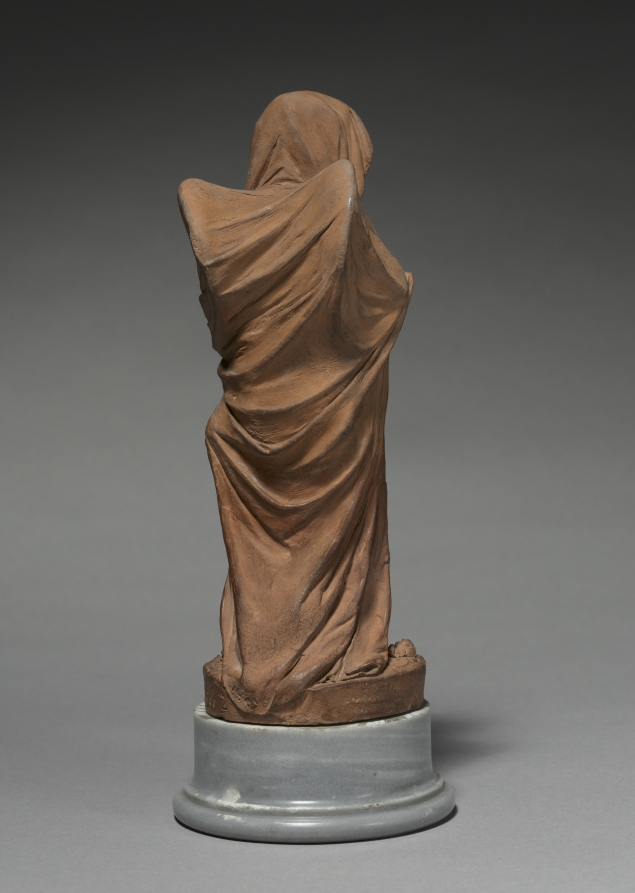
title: Cupid Secretly Drawing an Arrow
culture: Belgium, Brussels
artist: Gilles-Lambert Godecharle (Belgian, 1750–1835)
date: 1807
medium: terracotta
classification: Sculpture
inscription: inscribed on the edge of the base at right: "Godecharle" and "1807."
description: This clay model is a maquette for a sculpture in limestone more than three feet tall, entitled Cupid Disguised, Hiding Under a Veil. The motif is borrowed from the Marlborough cameo (an ancient Roman cameo now at the Museum of Fine Arts, Boston, inv. no. 99.101) that was a source of inspiration for neoclassical artists. The gem illustrates the wedding of Cupid and Psyche—shown as veiled children with protruding wings—from which Godecharle extracted the single figure of Cupid and, instead, depicted him in ambush.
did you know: Cupid traipses daintily on rose blossoms, ready to shoot his love-filled arrow at an unsuspecting victim.